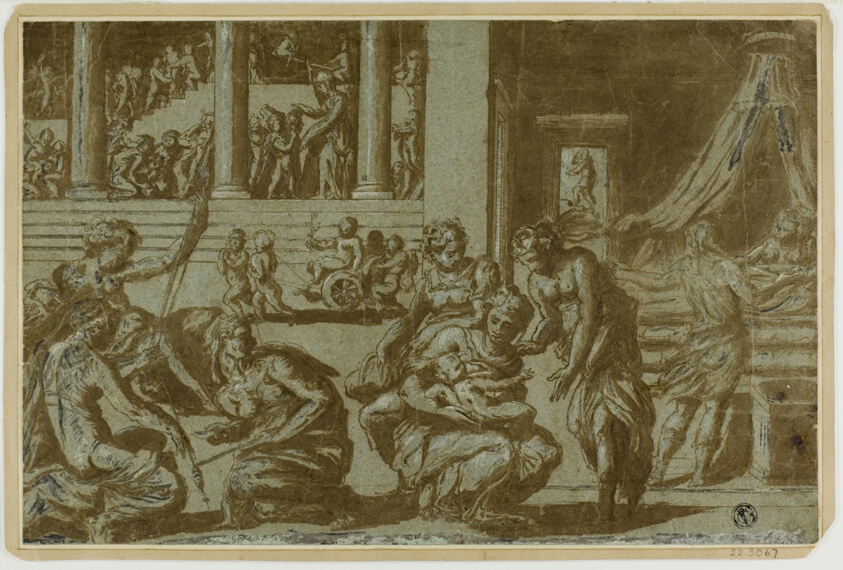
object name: Drawing and Watercolor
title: Study for the Allegory of Birth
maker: After Giorgio Vasari; Italian, 1511-1574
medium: Pen and brown ink, with brush and brown wash, heightened with lead white (partially oxidized), on blue laid paper, laid down on tan wove card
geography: Italy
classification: ink with wash; drawings (visual works); prints and drawing